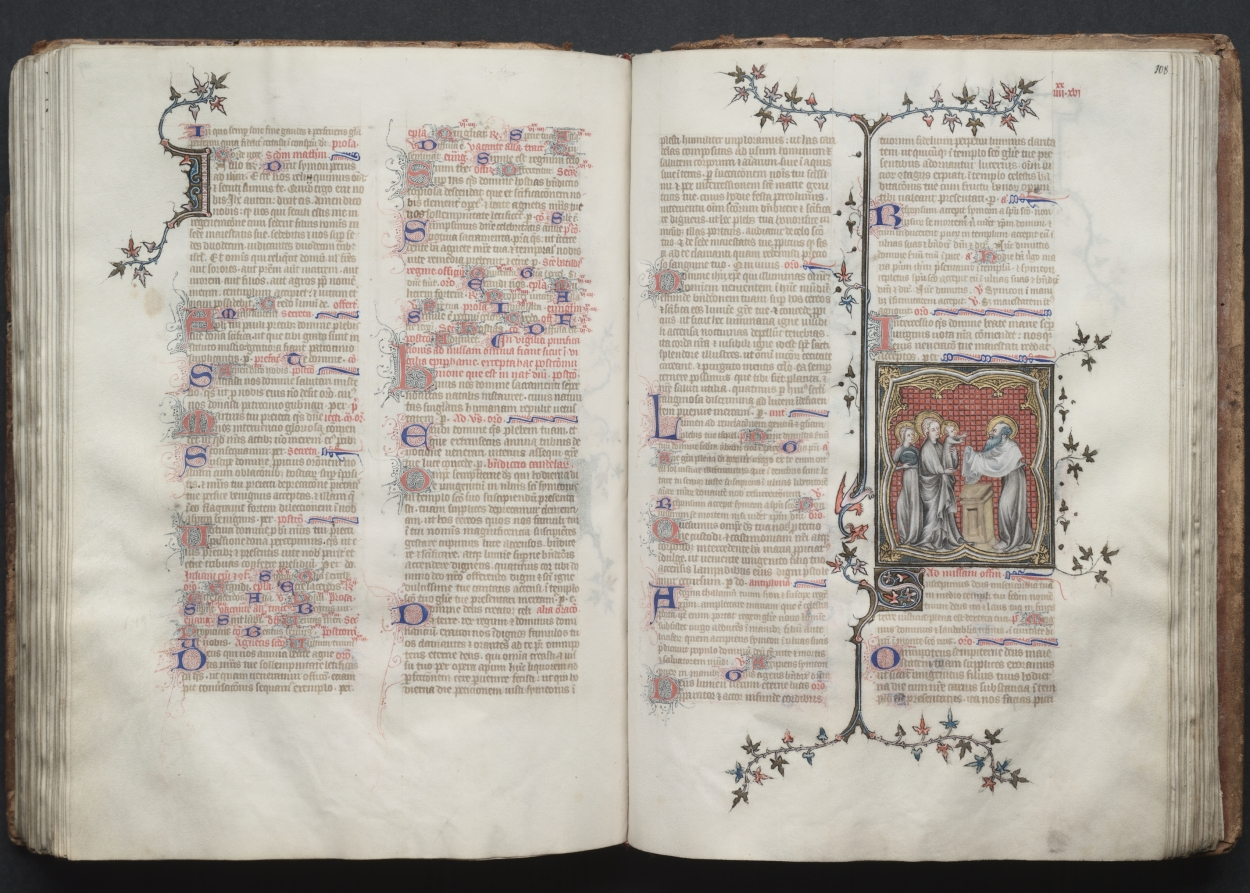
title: The Gotha Missal: Fol. 107v, Text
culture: France, Paris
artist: Master of the Boqueteaux (French)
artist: and Workshop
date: c. 1375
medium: ink, tempera, and gold on vellum; blind-tooled leather binding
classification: Bound Volume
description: The style and quality of this manuscript's decoration is typical of deluxe Parisian books made for aristocratic or royal patrons. Most of the book's decoration appears to be the work of the Master of the Boqueteaux, an artist active at the court of King Charles V (died 1380). His style was apparently shared by a number of book illuminators working in and around Paris. It is very possible that the Gotha Missal belonged to Charles V, but is not provable because the manuscript has no royal portraits and lacks a colophon. Given the book's magnificent decoration, however, it would seem that it was produced for a Valois prince, if not for the king himself. The manuscript receives its name from the German dukes of Gotha, its later owners.